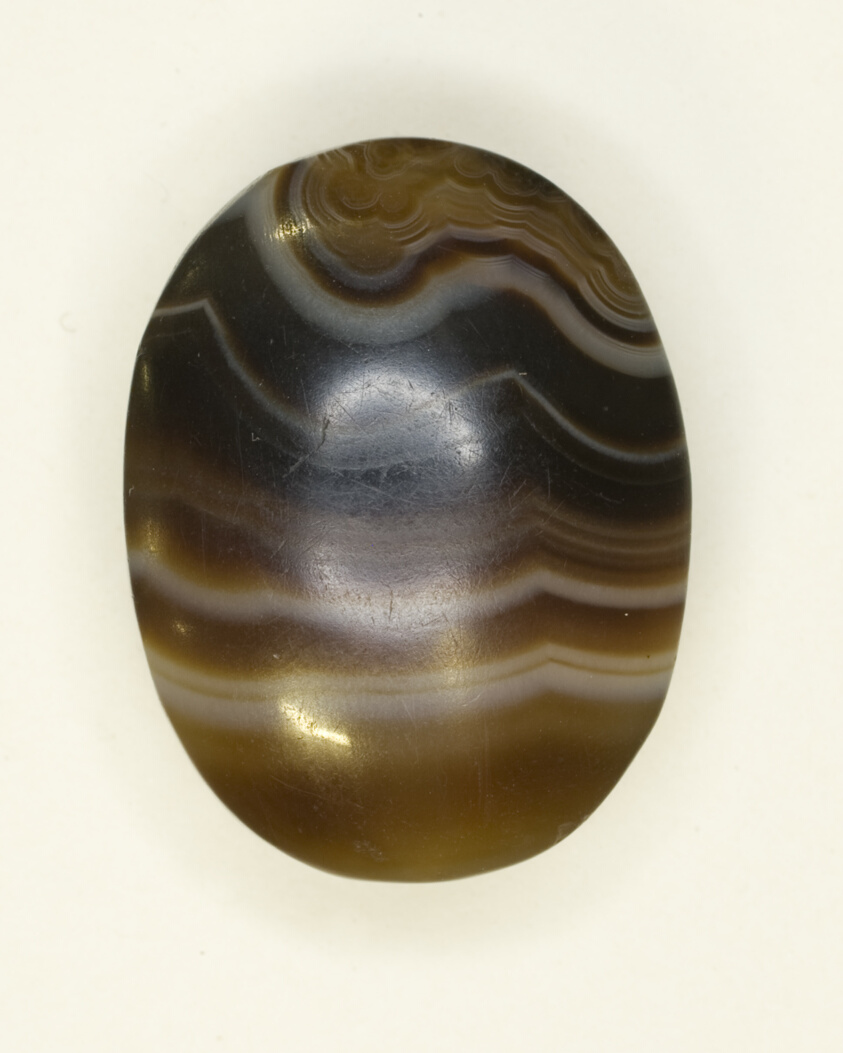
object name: Costume and Accessories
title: Oval Plaque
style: greco-roman (egyptian), roman period (egyptian), ptolemaic, ancient, egyptian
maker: Egyptian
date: Ptolemaic Period–Roman Period (332 BCE–395 CE)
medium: Agate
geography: Egypt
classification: stone; plaque (flat object); amulet; ancient art; costume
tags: brown (color)